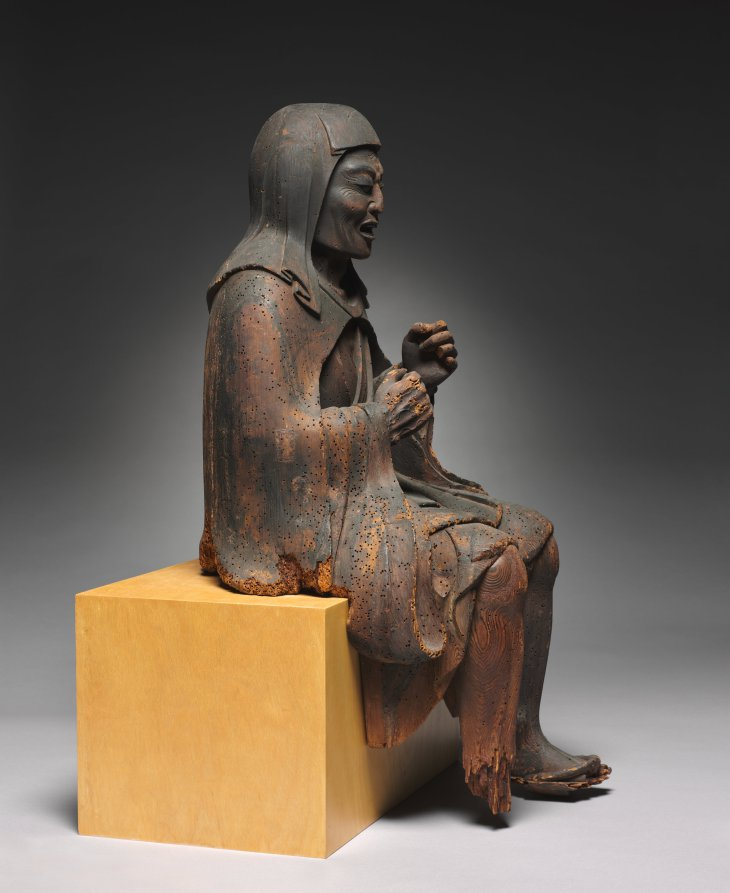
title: En no Gyōja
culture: Japan, Kamakura period (1185–1333)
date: 1200s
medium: wood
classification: Sculpture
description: This Buddhist monk is known as En no Gyōja, or “En the Ascetic” (legendarily 634–701), who is said to have founded Shugendō, a style of religious practice focused on performing challenging, rigorous tests of courage and devotion in mountainous settings.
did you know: This sculpture was once flanked by the demons Zenki and Koki (CMA 2012.40).